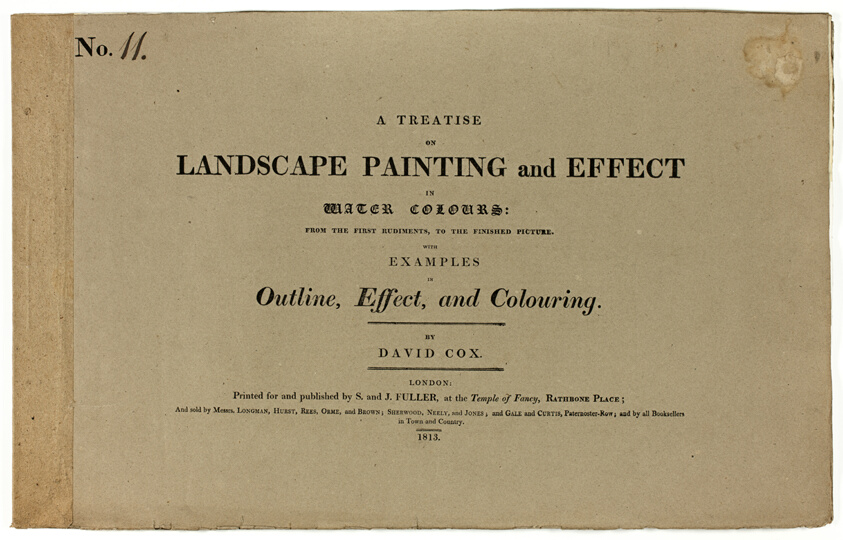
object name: Book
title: A Treatise on Landscape Painting and Effect in Water Colours: From the First Rudiments, to the Finished Picture No. 11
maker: David Cox, the elder (English, 1783-1859); engraved by Richard Reeve (English, 1780-c. 1835); published by S. and J. Fuller (English, 19th century)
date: 1813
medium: Book with four color aquatints and letterpress in black on cream wove paper, in box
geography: England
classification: book; paper; prints and drawing